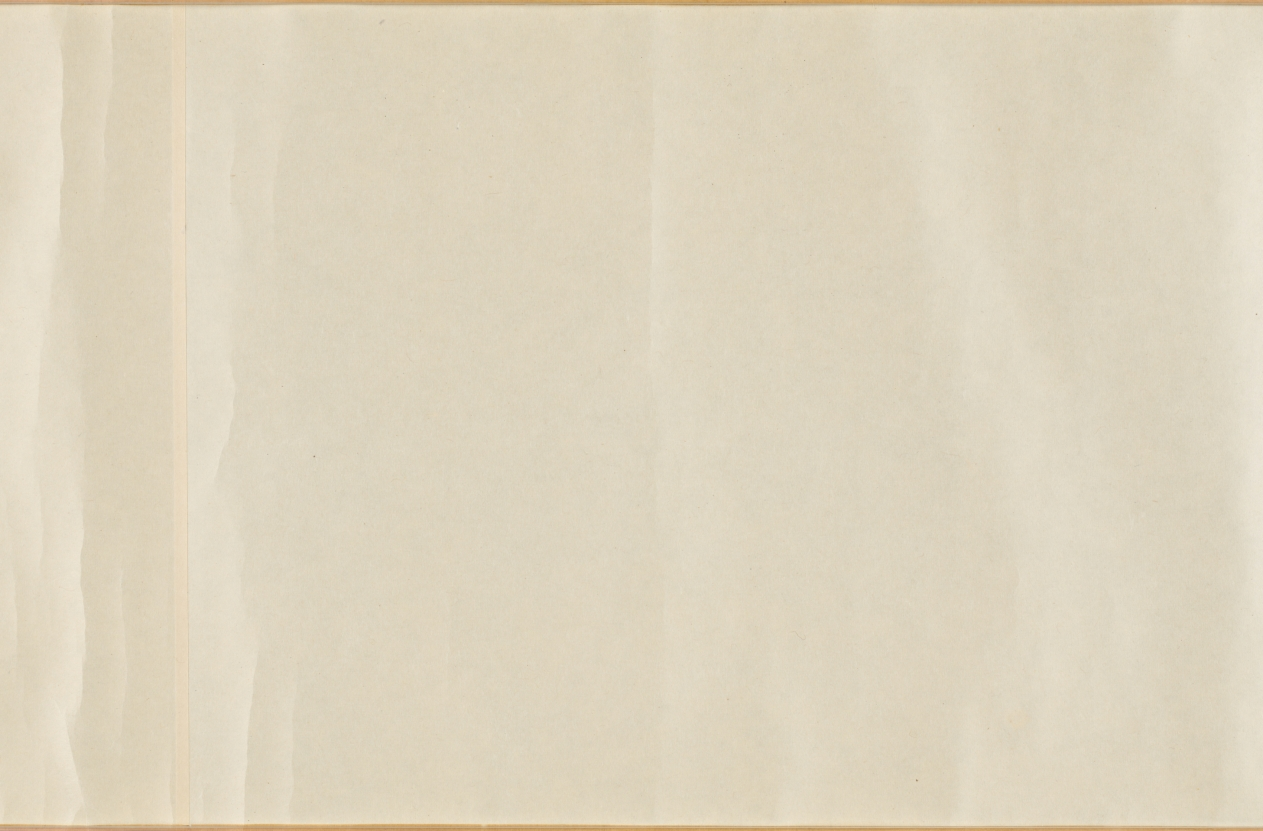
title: Selections from the New Collection of Japanese Poems from Ancient and Modern Times (Shinkokin wakashū) with Printed Designs of Chinese Lions and Crab Finger Grass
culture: Japan, Edo period (1615–1868)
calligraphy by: Hon'ami Kōetsu (Japanese, 1558–1637)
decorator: Tawaraya Sōtatsu (Japanese, c. 1570–c. 1640)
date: early 1600s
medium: handscroll; ink, gold, and silver on paper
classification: Calligraphy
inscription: Seal: 光悦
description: Hon’ami Kōetsu was a calligrapher and craftsman who frequently collaborated with the painter Tawaraya Sōtatsu, considered the first master of the Rinpa school. Kōetsu brushed seven poems from the autumn section of a poetry anthology onto dyed paper with motifs designed and printed in gold and silver by Sōtatsu.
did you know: Before becoming a master painter of screens, Tawaraya Sōtatsu painted fans.